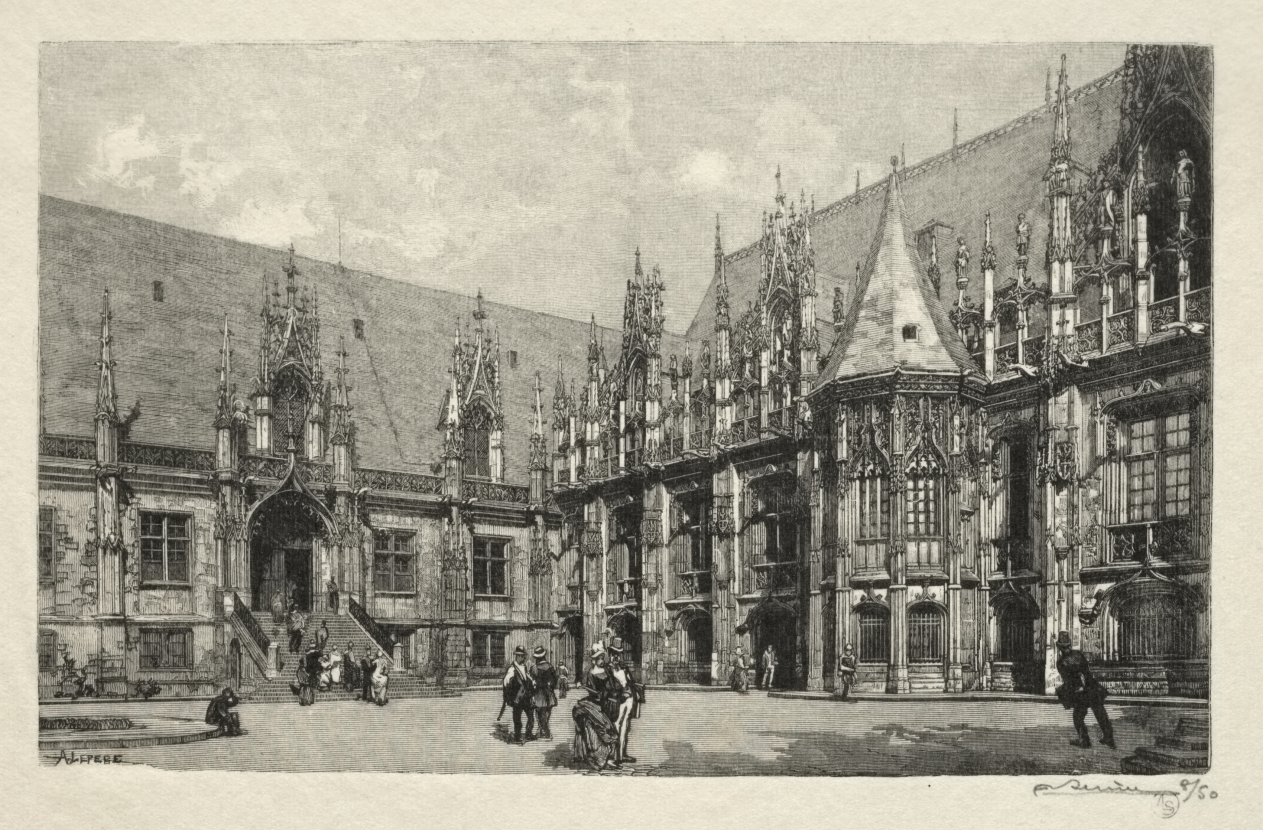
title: Rouen Illustré: Le Palais du Justice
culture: France, 19th century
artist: Auguste Louis Lepère (French, 1849–1918)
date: 1896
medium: wood engraving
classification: Print